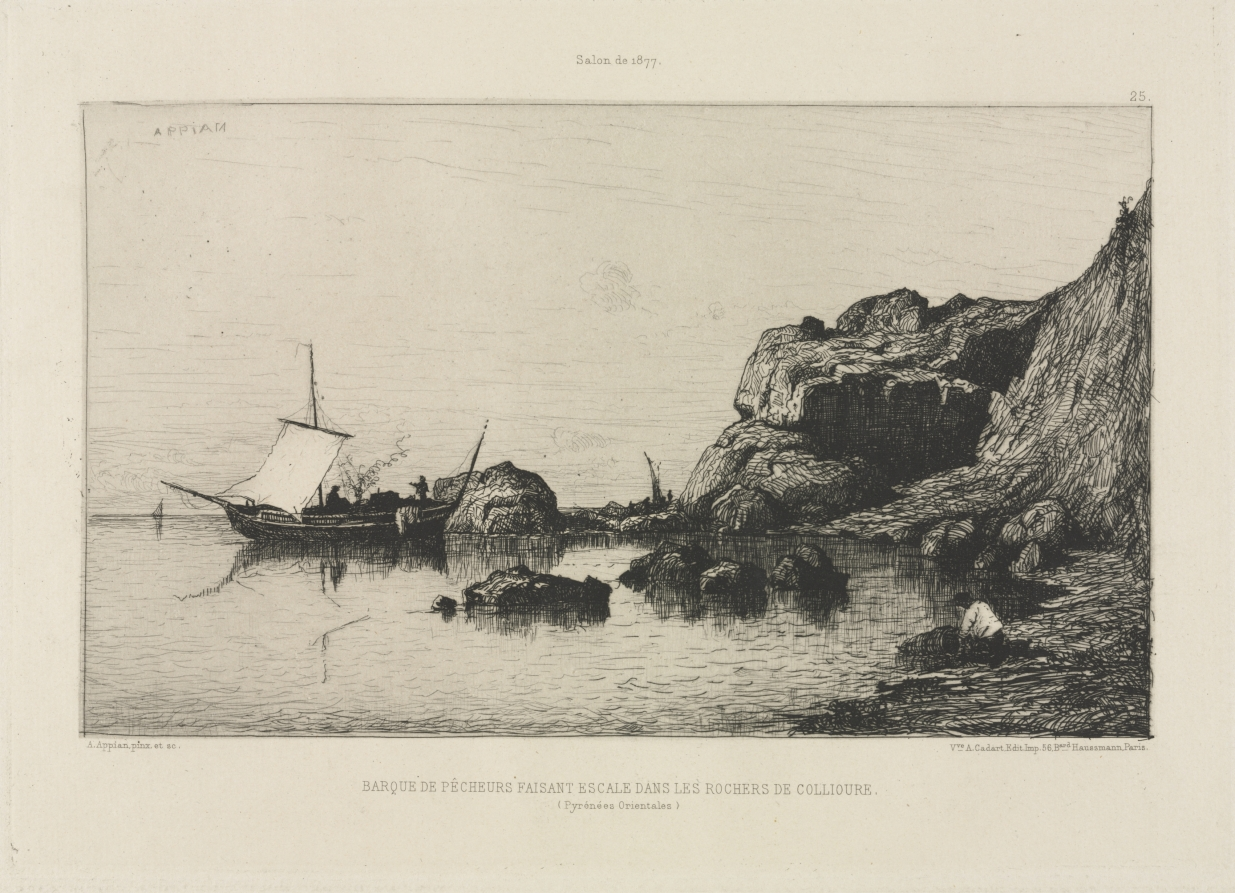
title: Fishing boat making a port of call at the rocks of Collioure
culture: France, 19th century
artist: Adolphe Appian (French, 1818–1898)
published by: Alfred Cadart (French, 1825–1875)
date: 1878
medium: etching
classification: Print